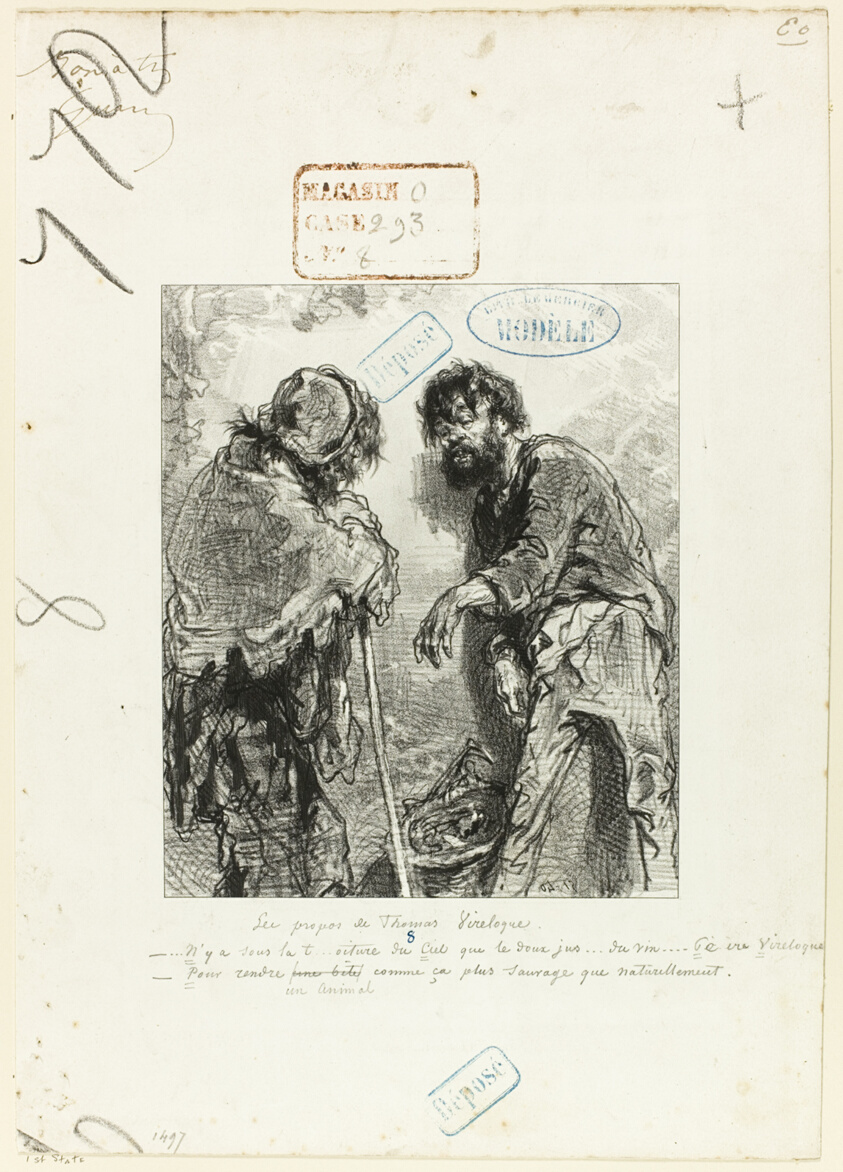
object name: Print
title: Les Propos de Thomas Vireloque: Under the Roof of Heavens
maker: Paul Gavarni (French, 1804-1866)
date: 1852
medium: Lithograph in black on cream wove paper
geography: France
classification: lithograph; print; prints and drawing